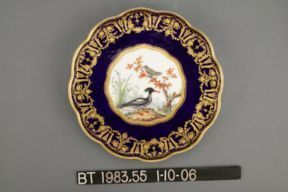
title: Footed Dish (soucoupe à pied)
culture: France, Sèvres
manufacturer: Sèvres Porcelain Factory (French, est. 1756)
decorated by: Etienne Evans (French, 1733–1806)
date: 1786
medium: soft-paste porcelain with enamel and gilt decoration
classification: Ceramic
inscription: [Painted in blue, beneath base]: "Harle hupé, Mâle"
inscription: [Incised twice]: "22"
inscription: [Interlaced Ls with date letter]: "ii"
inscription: Painter's mark of a dagger for Etienne Evans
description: These dishes may have supported cups of sweet ices or pyramidal displays of fruits or sweetmeats as part of a dessert or tea service. On the reverse of the plate the two birds pictured are identified as a Petit Perruche, du Pérou (budgerigar from Peru) and Harle huppé, Mâle (male red-breasted merganser.) Their images were modeled after engravings in naturalist Georges-Louis Leclerc’s Natural History of Birds, a book which regularly inspired Sèvres porcelain paintings in the 1780s and 90s.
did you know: The dark blue ground that rings the edge of this plate is known as beau bleu (beautiful blue) and derived its color from cobalt added to the enamel.